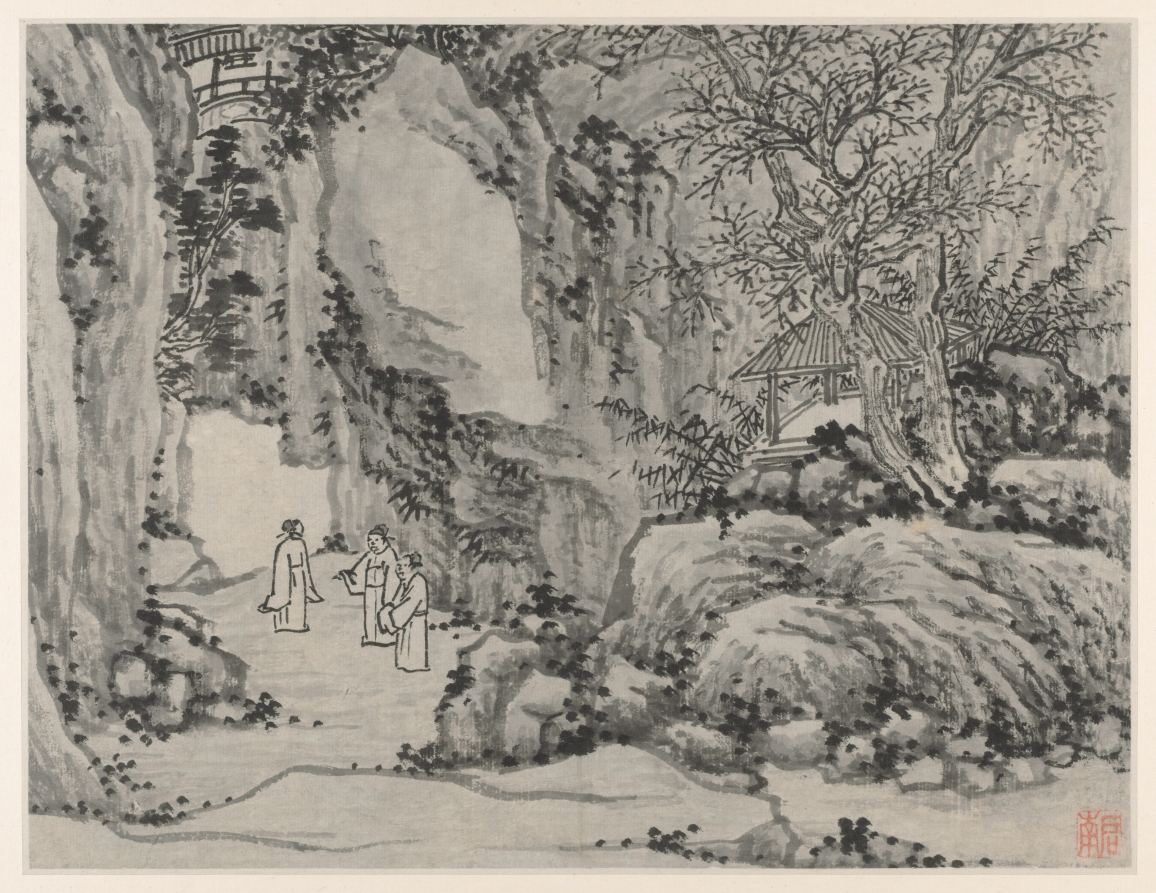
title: The Sword Spring, Tiger Hill, from Twelve Views of Tiger Hill, Suzhou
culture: China, Ming dynasty (1368–1644)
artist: Shen Zhou (Chinese, 1427–1509)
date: after 1490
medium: Album leaf; ink on paper or ink and slight color on paper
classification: Painting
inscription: [印] 启南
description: Views of Tiger Hill depicts a historic site a few miles northwest of Suzhou. The scenes simulate a visit from arriving by boat at the foot of the mountain to climbing to Cloudy Cliff Monastery. Representations of the artist’s mature style, Shen Zhou included views in subtle colors in the suite of monochrome scenes. A Suzhou native, Shen Zhou was supported by family wealth and rejected an official career in favor of life as a retired scholar. Turning to painting in midlife, he is regarded as the founder of the Wu School of painting, with its center in Suzhou.